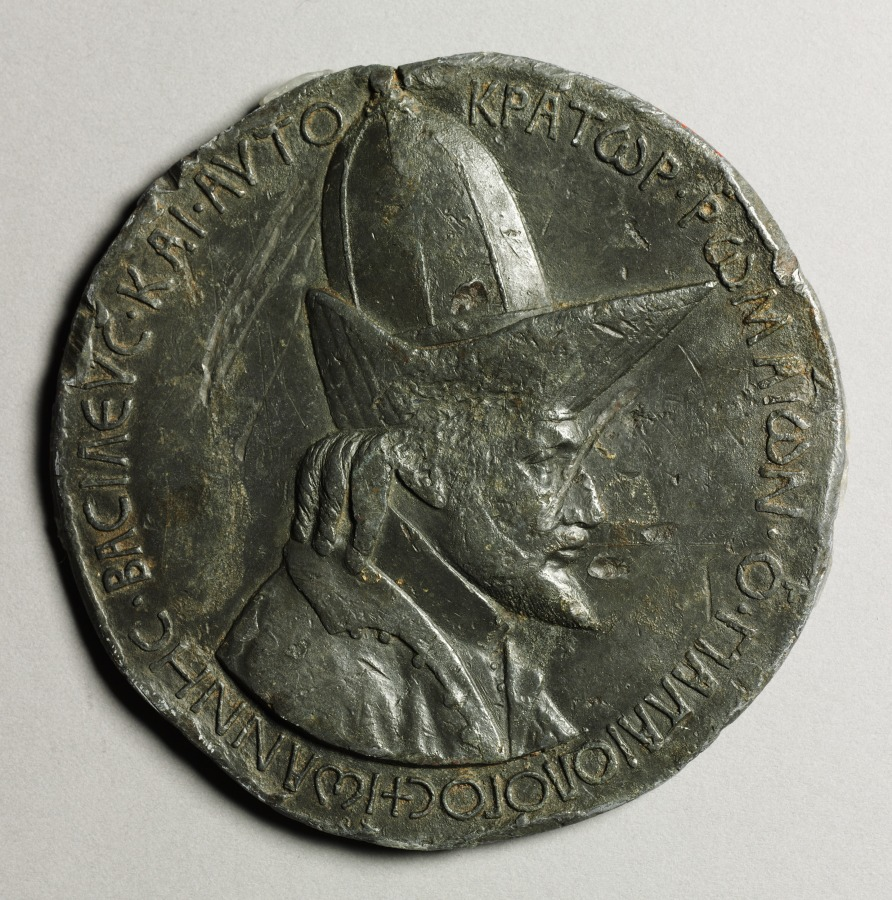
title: Portrait of John VIII Palaeologus, Emperor of Constantinople, 1424-1428 (obverse) and (reverse)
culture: Italy, 15th century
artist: Pisanello (Italian, Ferrara, c. 1395–1455)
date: c. 1438–39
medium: lead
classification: Sculpture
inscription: obverse: IWANNHC BACI EVC KAI AVTOKPATWP PWMAIWN O A AIOA O OC [John King and Emperor of the Romans, Palaeologus]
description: The art of the medal was introduced into Italy by Pisanello, His work as a medalist began with the portrait medal of this emperor, who, in 1438, visited the Council of Ferrara.